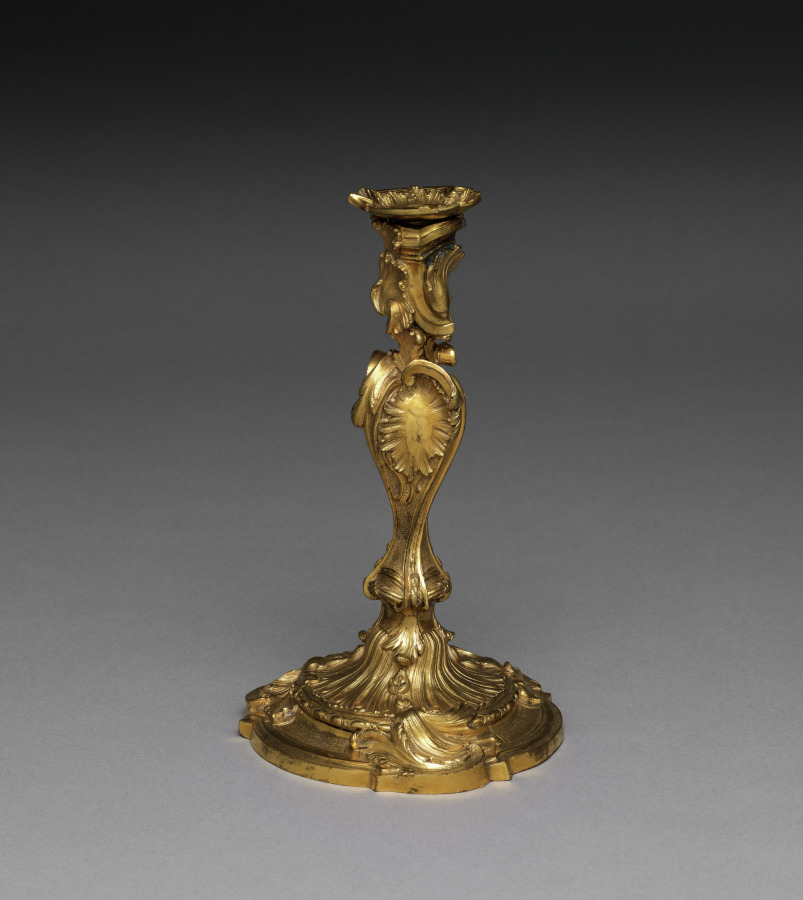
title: Candlestick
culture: France, 18th century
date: 1745–1749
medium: gilt metal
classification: Furniture and woodwork